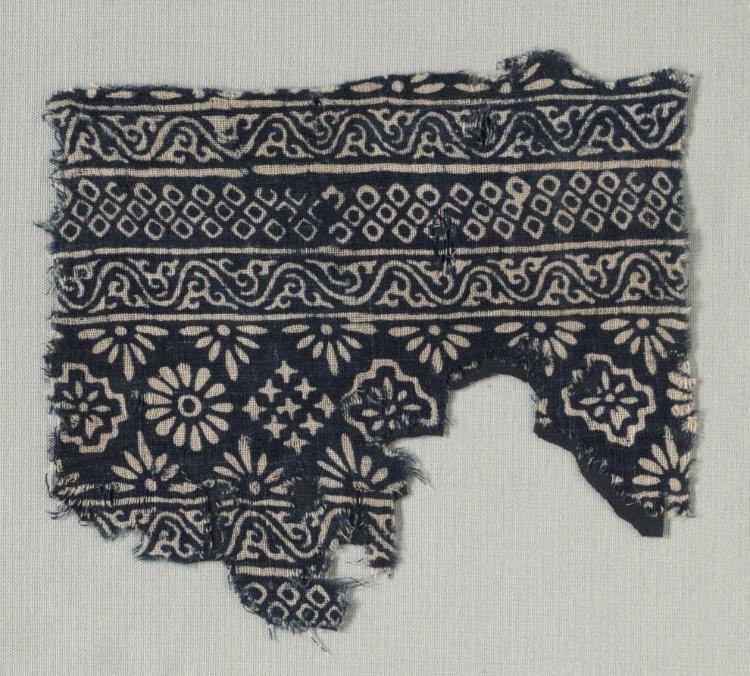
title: Fragment with decorated bands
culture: India, Gujarat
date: probably 1400s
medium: plain weave: cotton, stamped resist and dyed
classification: Textile